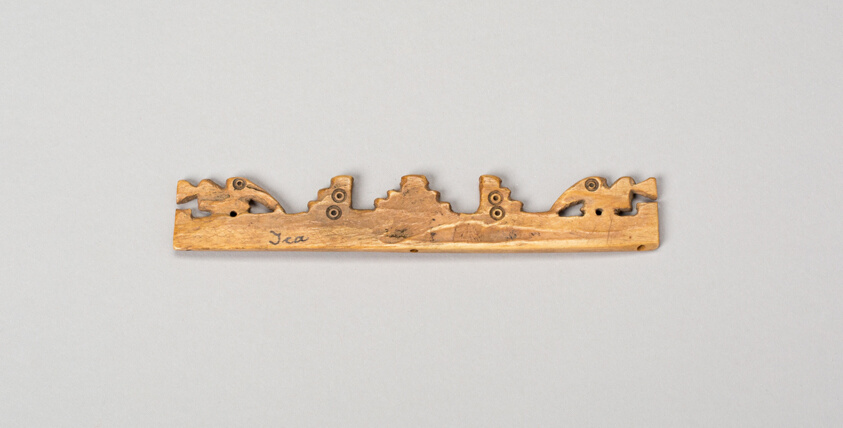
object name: Decorative Arts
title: Balance-Beam Scale with Cut-Out Bird and Step Motifs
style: nazca, early intermediate period, Pre-Columbian, americas, Arts of the Americas, andean, andes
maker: Possibly Nazca or Ica; South coast, Peru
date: 500–1400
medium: Bone with pigment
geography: Peru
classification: bone; american decorative arts; tool; decorative arts; art of the americas